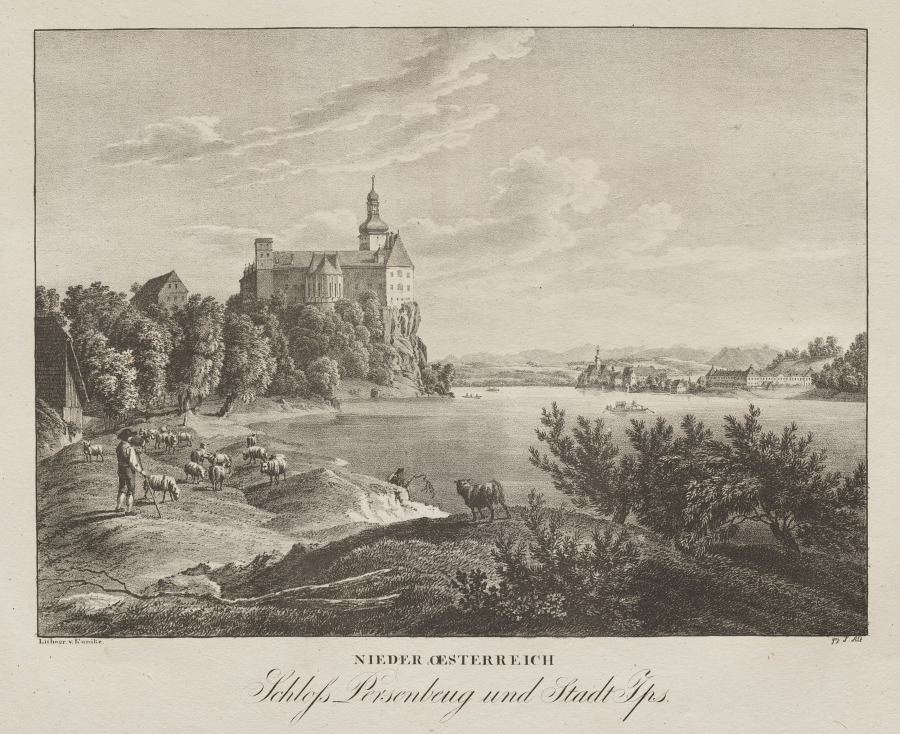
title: Nieder-oesterreich, Schloss Persenbeug und Stadt Ips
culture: Austria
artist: Jakob Alt (Austrian, 1789–1872)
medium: lithograph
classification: Print